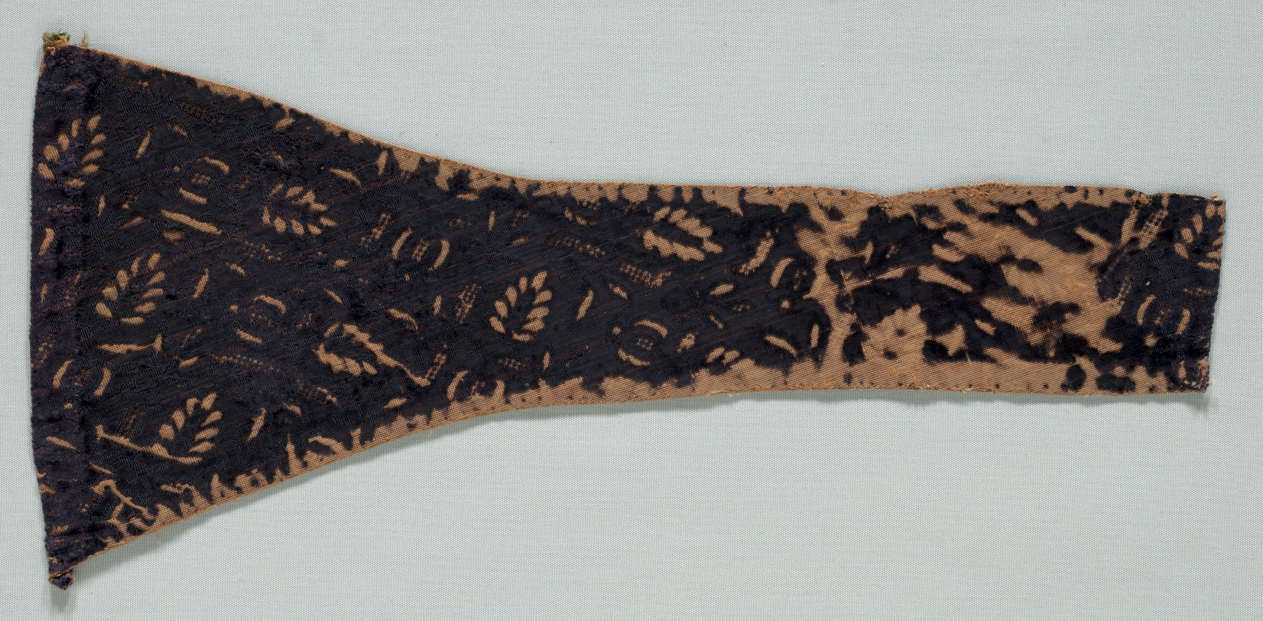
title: Fragment of a Stola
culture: Italy, late 17th century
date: late 1600s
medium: velvet (cut and uncut); silk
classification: Velvet